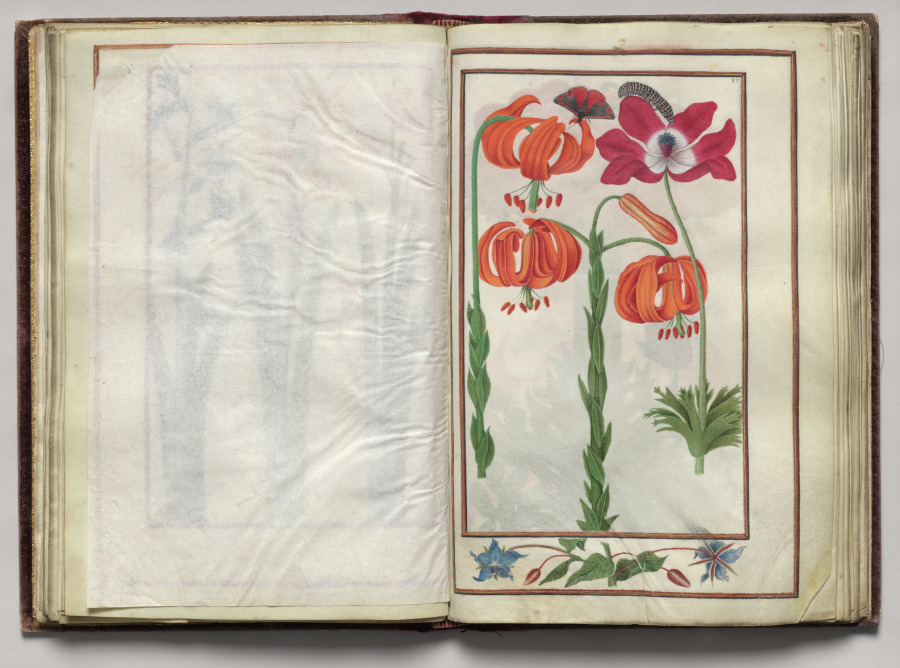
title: Lily, Anemone, Borage, and Caterpillar, with Floral Border, folio 19 (recto), from Florilegium (A Book of Flower Studies)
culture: France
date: 1608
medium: watercolor, ink, silver, and gold over occasional traces of pencil, on vellum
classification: Bound Volume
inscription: Dated: Poitiers 1608 (on frontispiece) Signed: On frontispiece in black ink, lower right: Van Kuyk Notation on drawing: Frontispiece: in pencil, lower margin: * élève de Van Kessel, peintre flammand (* in pencil also appears in front of Van Kuyk's name).